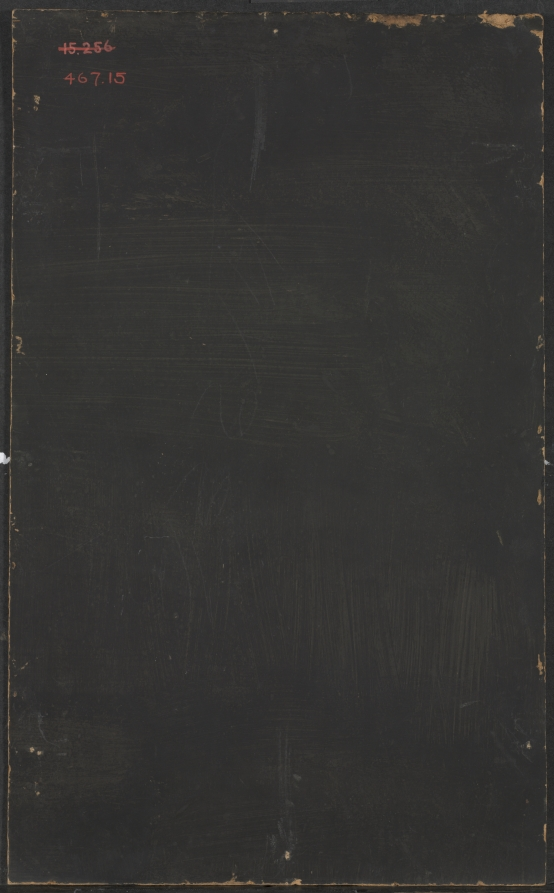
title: Pitcher and a Glass on a Table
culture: America, Ohio, Cleveland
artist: Otto H. Bacher (American, 1856–1909)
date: 1878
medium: oil on wood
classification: Painting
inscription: signed upper left corner: Otto H. Bacher / 78